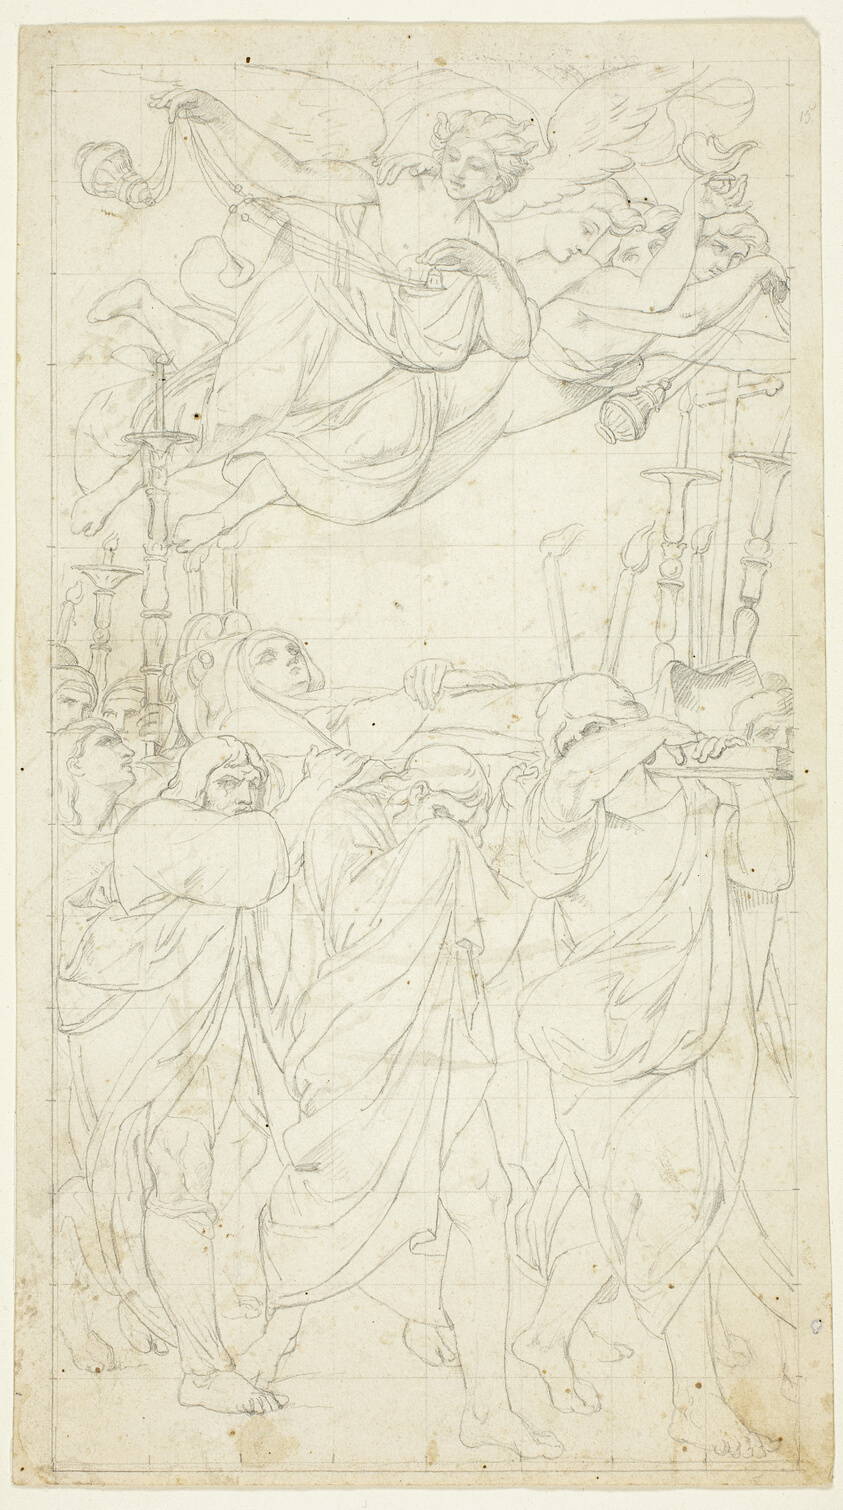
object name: Drawing and Watercolor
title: Funeral of the Virgin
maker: Peter Cornelius (German, 1783-1867); after Ludovico Carracci (Italian, 1555-1619)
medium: Graphite on ivory wove paper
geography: Germany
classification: graphite; drawings (visual works); prints and drawing